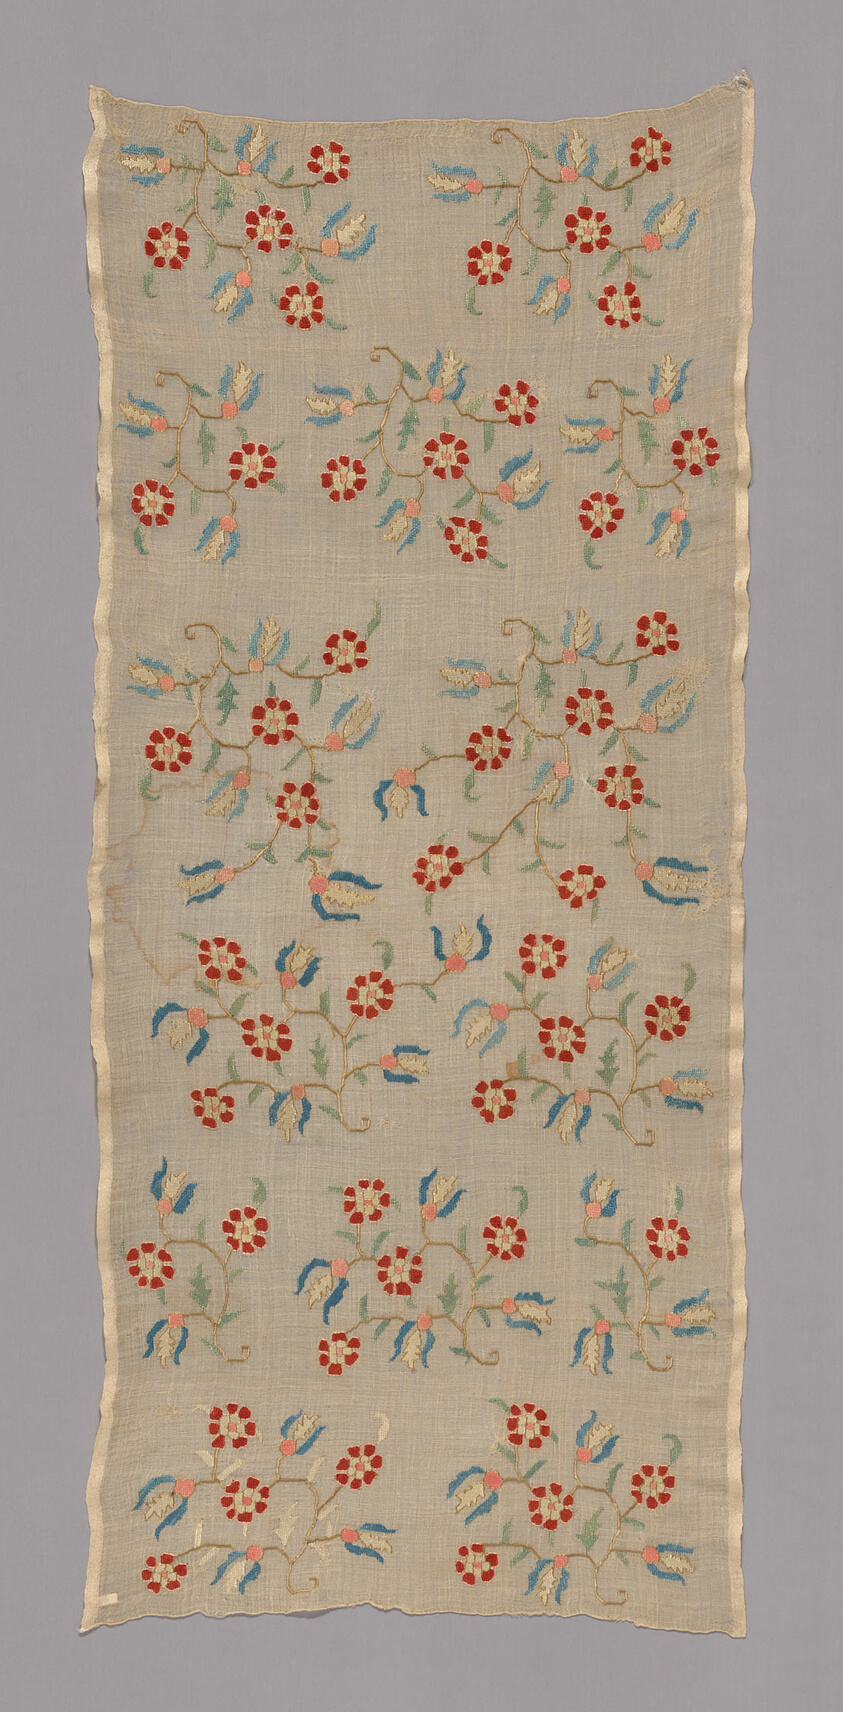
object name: Textile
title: Cover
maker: Turkey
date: 17th/early 18th century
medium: Tray cloth embroidered over all in a repeated rose spray pattern in red, green, white, blue, rose and brown.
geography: Turkey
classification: textile; weaving; needlework (visual works)